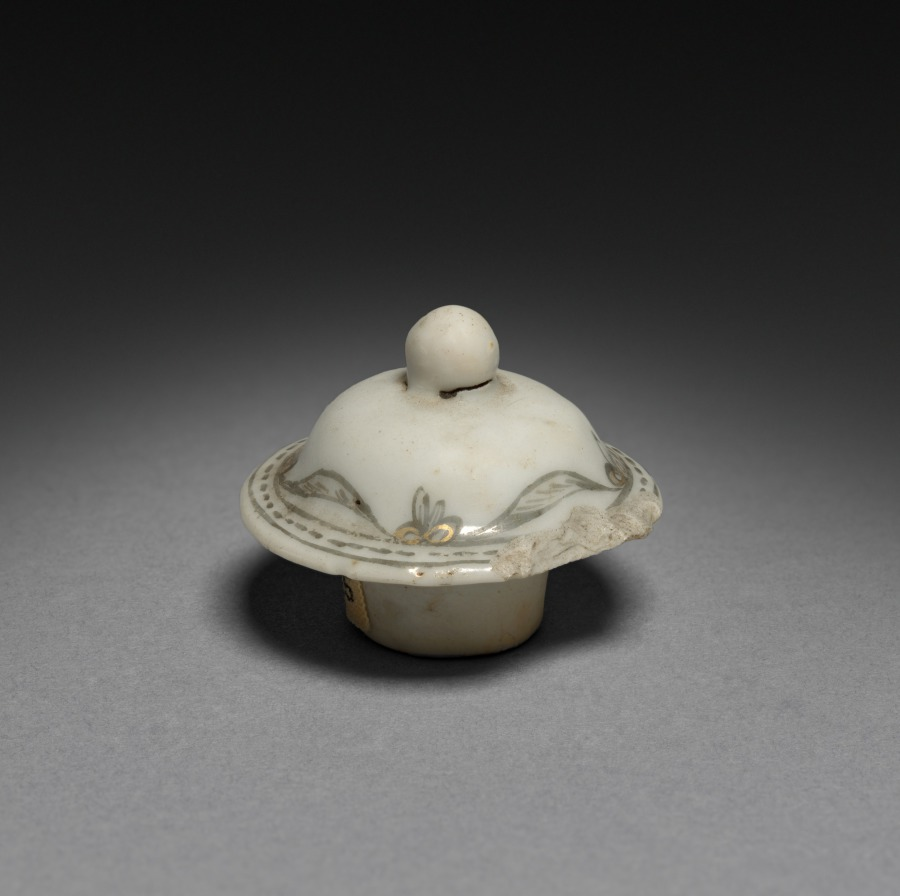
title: Tea Caddy (lid)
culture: China, Chinese Export -- European Market, 18th century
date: c. 1750–1770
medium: porcelain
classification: Ceramic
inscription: on body of tea caddy the initials seem to be: "J A B" and "L B" interlaced in a rococo cartouche.